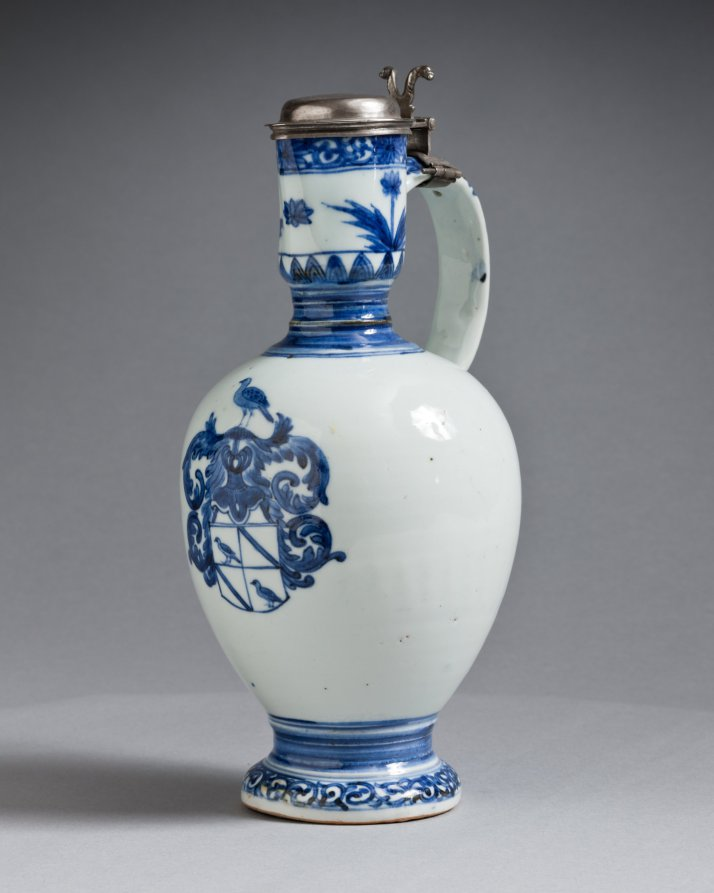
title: Jug with Silver Mounts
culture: Japan, Edo period (1615–1868)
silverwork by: Barent van Leeuwen (Dutch, 1637–1682)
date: c. 1662–76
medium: porcelain with underglaze blue decoration and silver mounts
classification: Ceramic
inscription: [on silver]: town mark for Amsterdam; lion rampant crowned (alloy mark for 0-934 silver); d (date letter for 1666), maker's mark of Barent van Leeuwen.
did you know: The coat of arms on this jug are those of the Valckenier family, active in the Dutch East India Company.